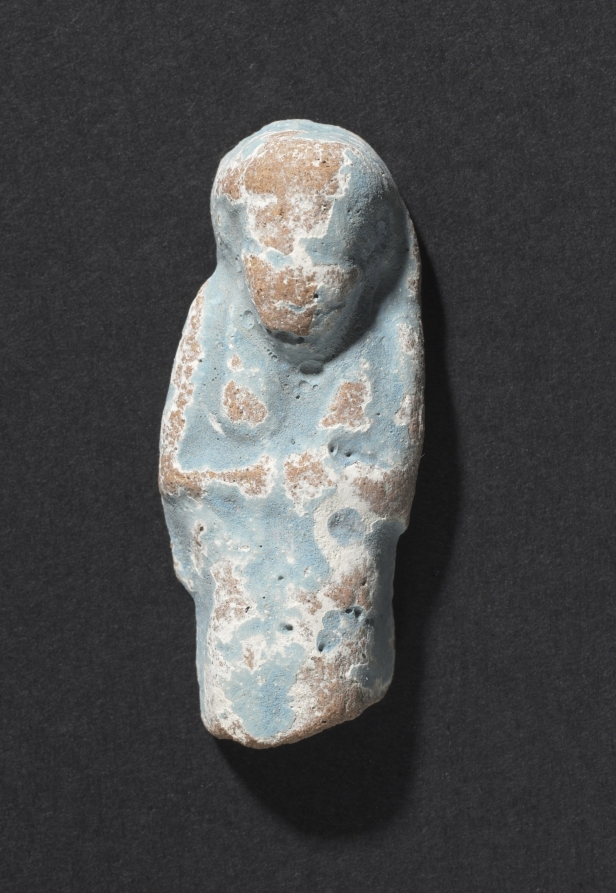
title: Shawabty of Ditamenpaankh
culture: Egypt, Late period (715–332 BCE), Dynasty 25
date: 715–656 BCE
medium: terracotta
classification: Funerary Equipment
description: High demand for shawabtys in the Late Period (when as many as 400 or more shawabtys were placed in a tomb), gave rise to a specialized container for storing them. This shawabty box was probably one of a pair originally made for the lady Ditamenpaankh. The single-masted boat on the lid may refer to the pilgrimage of the deceased to the holy city of Abydos, the cult city of Osiris, king of the dead. The sides are inscribed with the traditional shawabty spell charging the funerary servants with their duties. The shawabtys inside are crude, mass-produced examples that were cast in an open mold. Made of terracotta, their blue paint imitates more costly shawabtys made of faience.